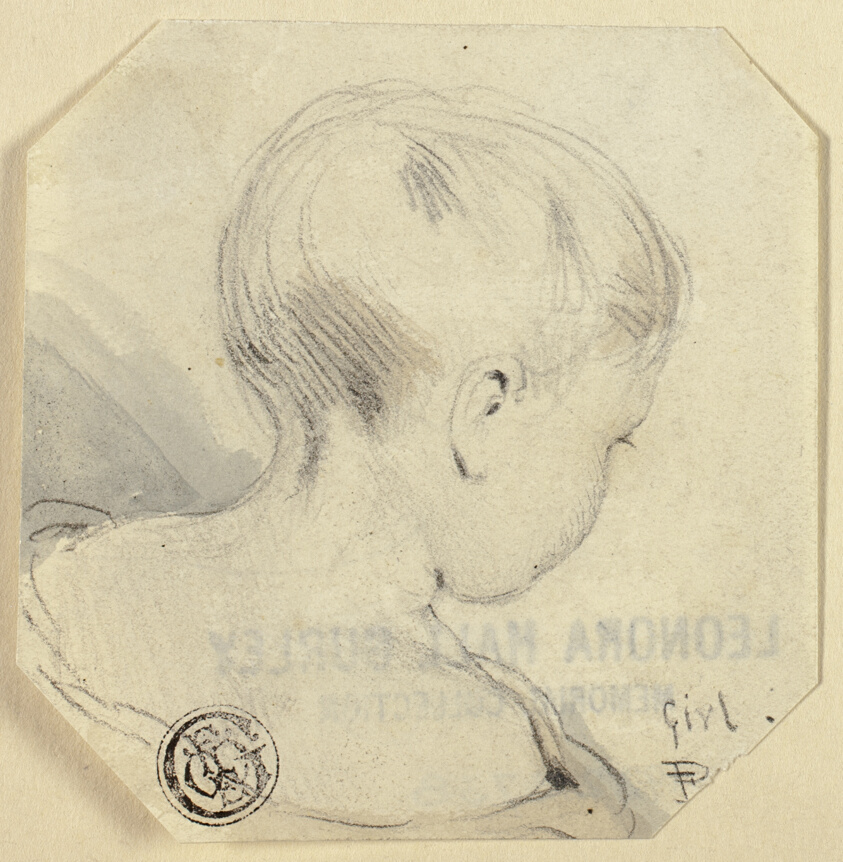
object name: Drawing and Watercolor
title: Girl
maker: Edmund Thomas Parris (English, 1793-1873)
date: c. 1827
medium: Graphite, with brush and pale brown and blue wash, on cream wove paper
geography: England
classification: graphite; drawings (visual works); prints and drawing